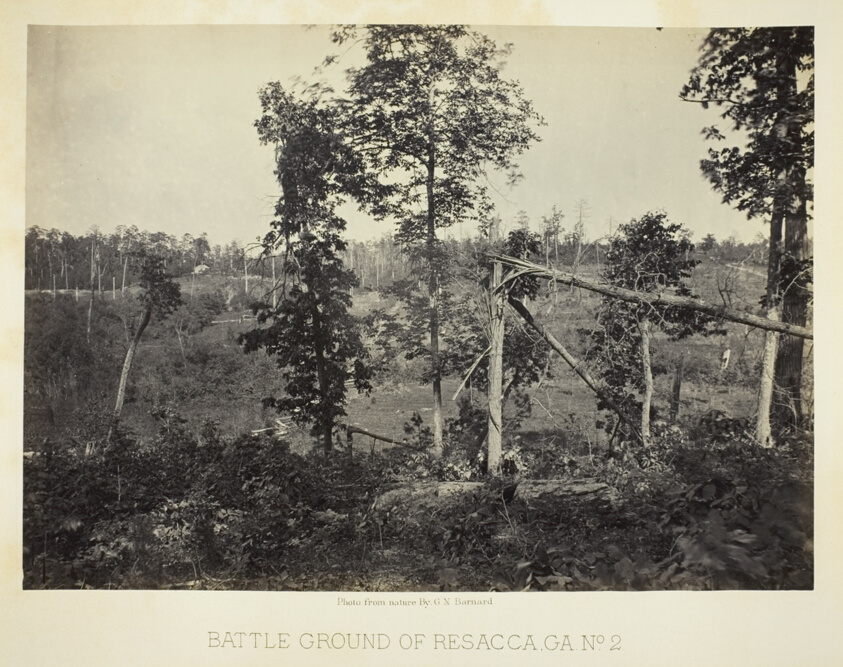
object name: Photograph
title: Battle Ground of Resacca, GA, No. 2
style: 19th century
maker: George N. Barnard (American, 1819–1902)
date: 1866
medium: Albumen print, plate 20 from the album "Photographic Views of the Sherman Campaign" (1866)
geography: United States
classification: albumen silver print; photographic process; photography; photograph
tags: Collected by Hugh Edwards, Sherman's Campaign 1866